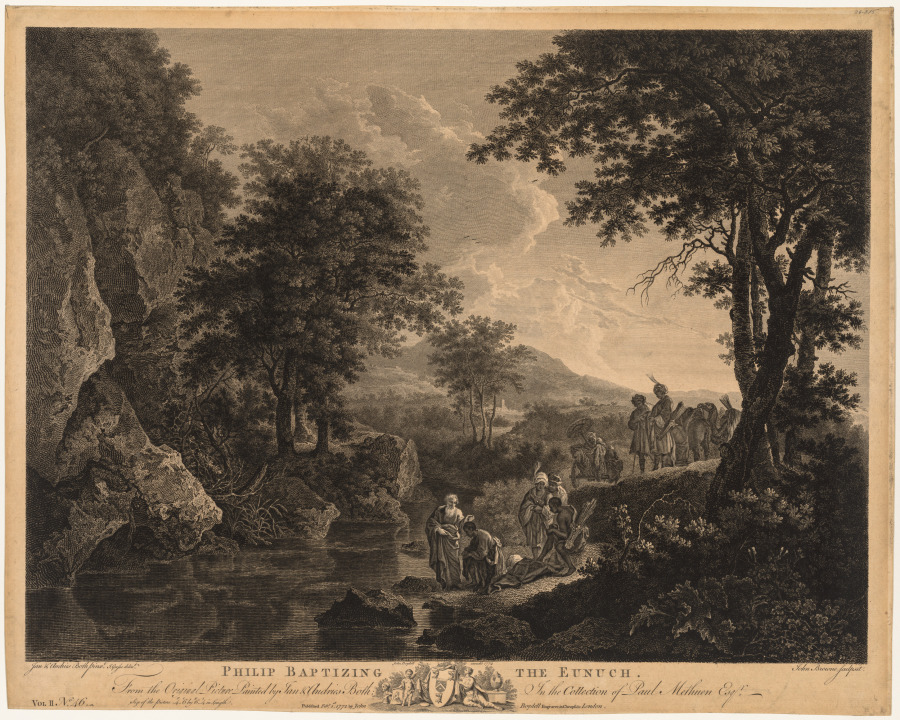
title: Philip Baptising the Eunuch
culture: England, 18th century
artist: John Browne (British, 1741–1801)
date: 1772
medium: engraving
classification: Print